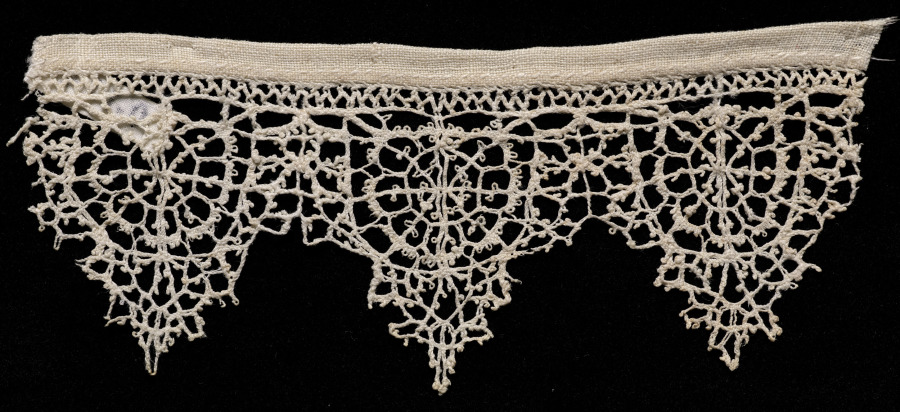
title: Lace Edging of Points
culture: Italy, Venice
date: 1580–99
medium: Bobbin lace (needle lace, reticella design)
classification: Lace